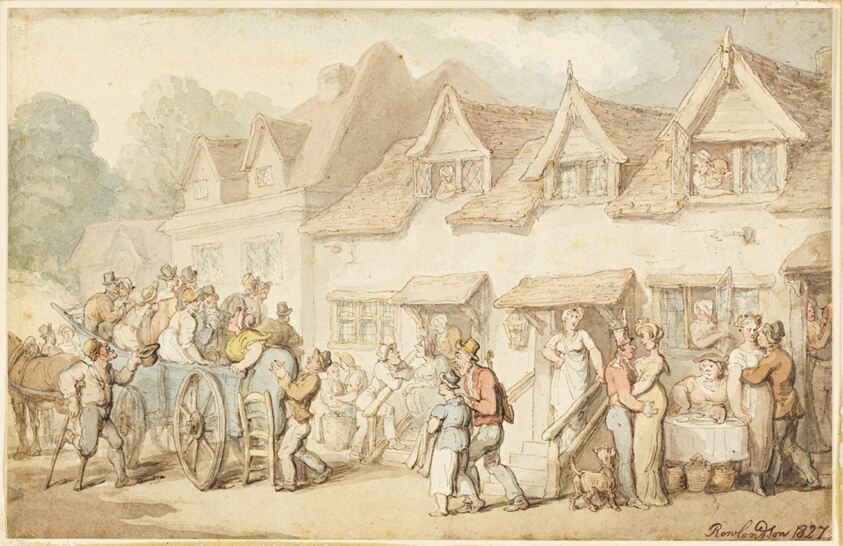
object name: Drawing and Watercolor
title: Coach Changing Horses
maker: Thomas Rowlandson (English, 1756-1827)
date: 1827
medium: Pen and brown ink with brush and watercolor, over traces of graphite, on ivory wove paper, laid down on board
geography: England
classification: watercolor; drawings (visual works); prints and drawing